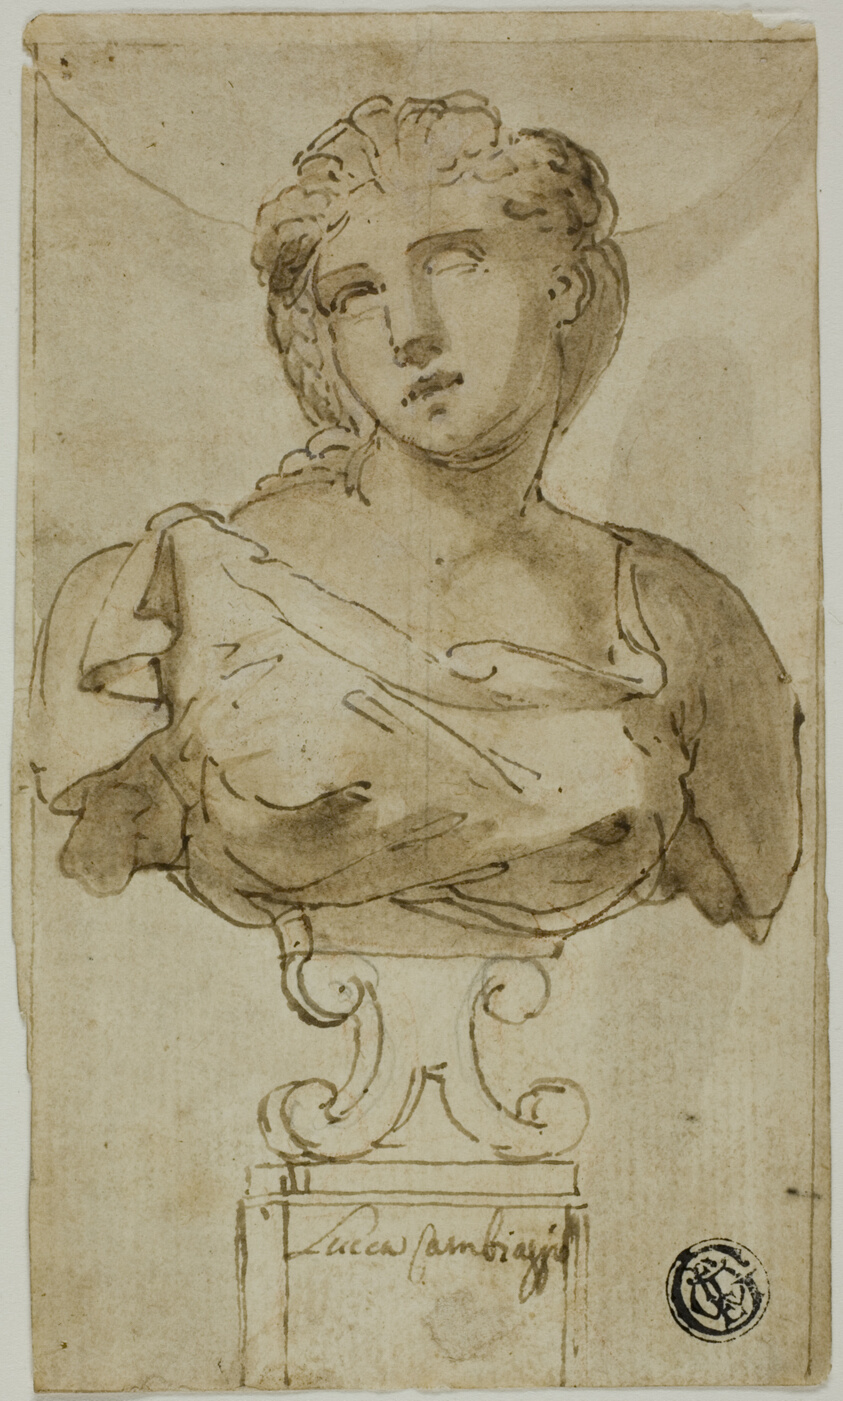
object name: Drawing and Watercolor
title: Bust of a Woman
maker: Attributed to Luca Cambiaso; Italian, 1527-1585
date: 1555/65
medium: Pen and brown ink with brush and brown wash, heightened with lead white, over traces of graphite, on ivory laid paper, laid down on ivory laid paper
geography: Italy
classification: pen and ink drawings; drawings (visual works); prints and drawing